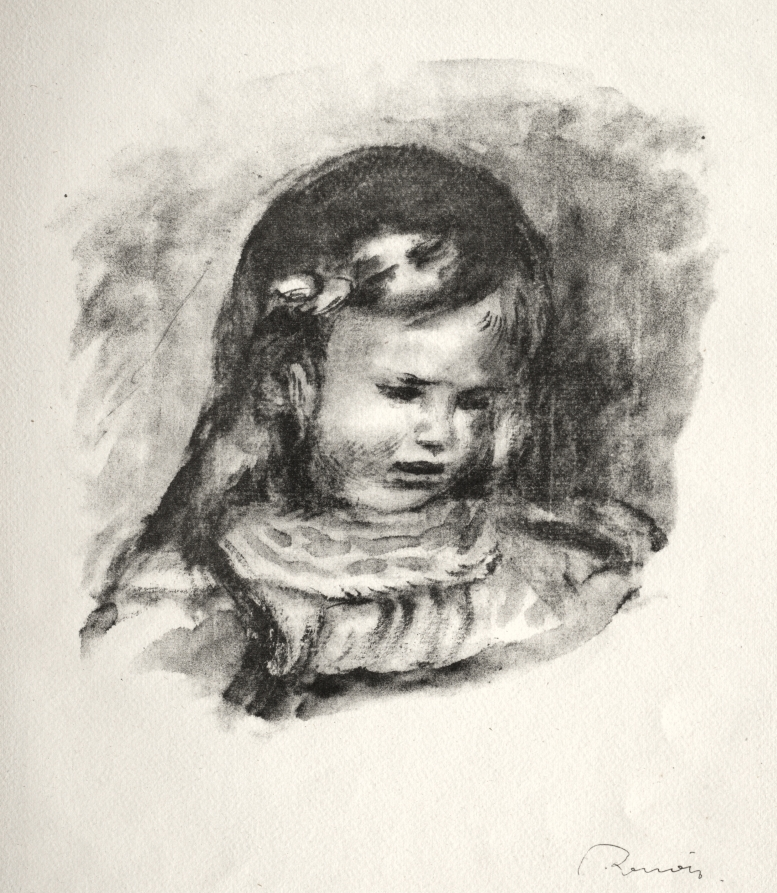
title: Claude Renoir, la tête baissée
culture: France, late 19th-early 20th Century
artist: Pierre-Auguste Renoir (French, 1841–1919)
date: 1904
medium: lithograph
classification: Print